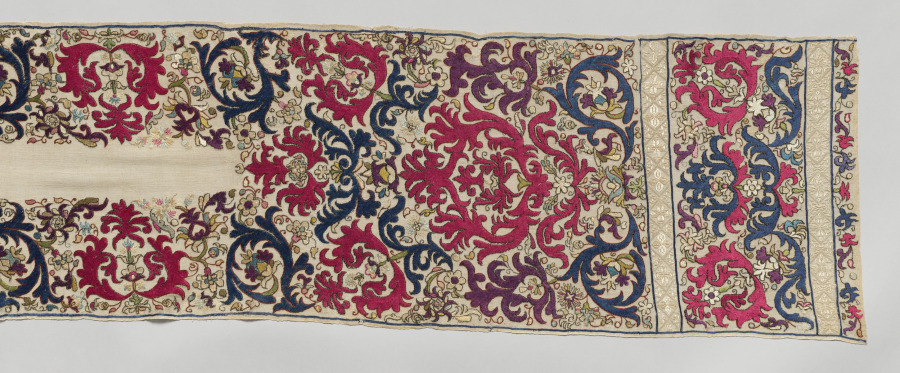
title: Headkerchief (tensifa)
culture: Africa, North Africa, Algeria, Algerian embroiderer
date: 1700s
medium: Linen, silk, gold, silver, dye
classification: Embroidery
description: This beautiful kerchief, worn wrapped around the head, was part of elegant bathing equipment that well-to-do women wore while relaxing in a hammam after bathing. The floral and foliate embroidery reflect a fashion that lasted for more than a century. This example is dominated by brilliant crimson and blue silk stitches.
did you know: This textile was displayed in the CMA’s first exhibition in 1916. While it is from North Africa, it was displayed in the "Nearer East" gallery.